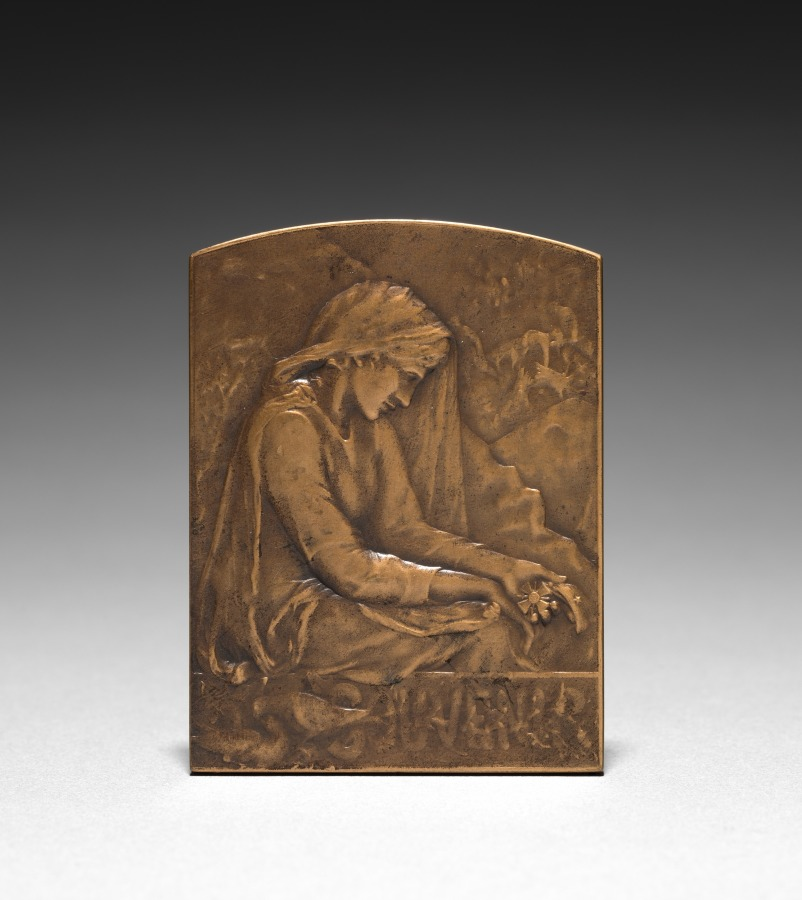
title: Medallion (obverse)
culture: France, 19th century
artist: Marie Alexandre Lucien Coudray (French, 1864–1932)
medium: bronze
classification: Metalwork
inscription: "SOUVENIR"; signed: "L. Coudray."